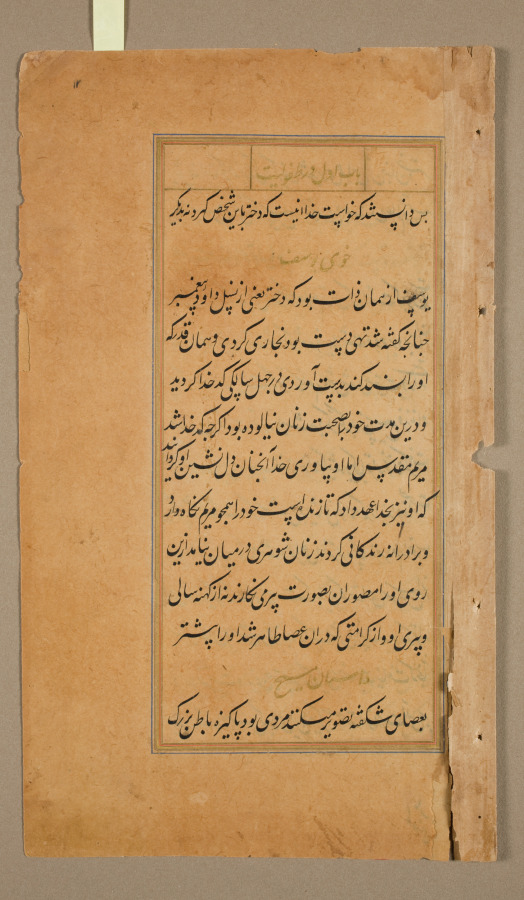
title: Text, Folio 12 (recto), from a Mirror of Holiness (Mir’at al-quds) of Father Jerome Xavier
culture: Mughal India, Allahabad, made for Prince Salim (1569–1627)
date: 1602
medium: Ink and gold on paper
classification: Manuscript